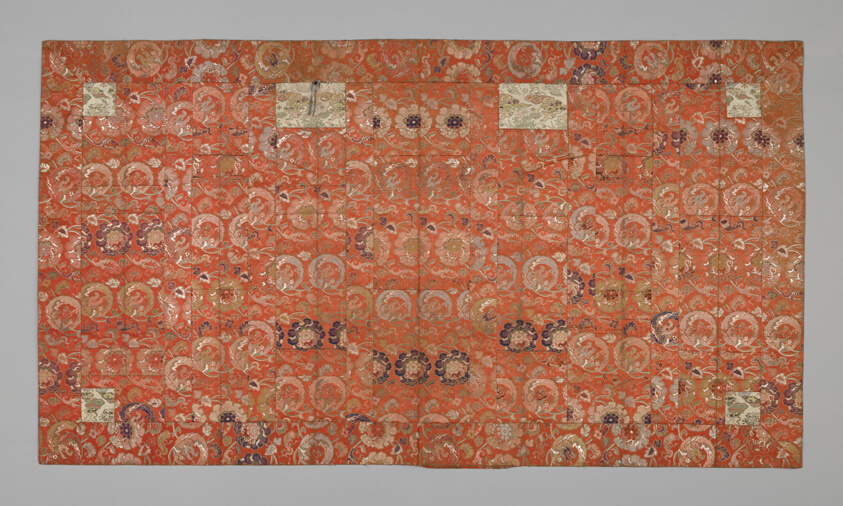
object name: Textile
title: Kesa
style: edo (japanese period)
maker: Japan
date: late Edo period (1789–1868), early 19th century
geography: Japan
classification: textile; costume; liturgical - buddhist; weaving